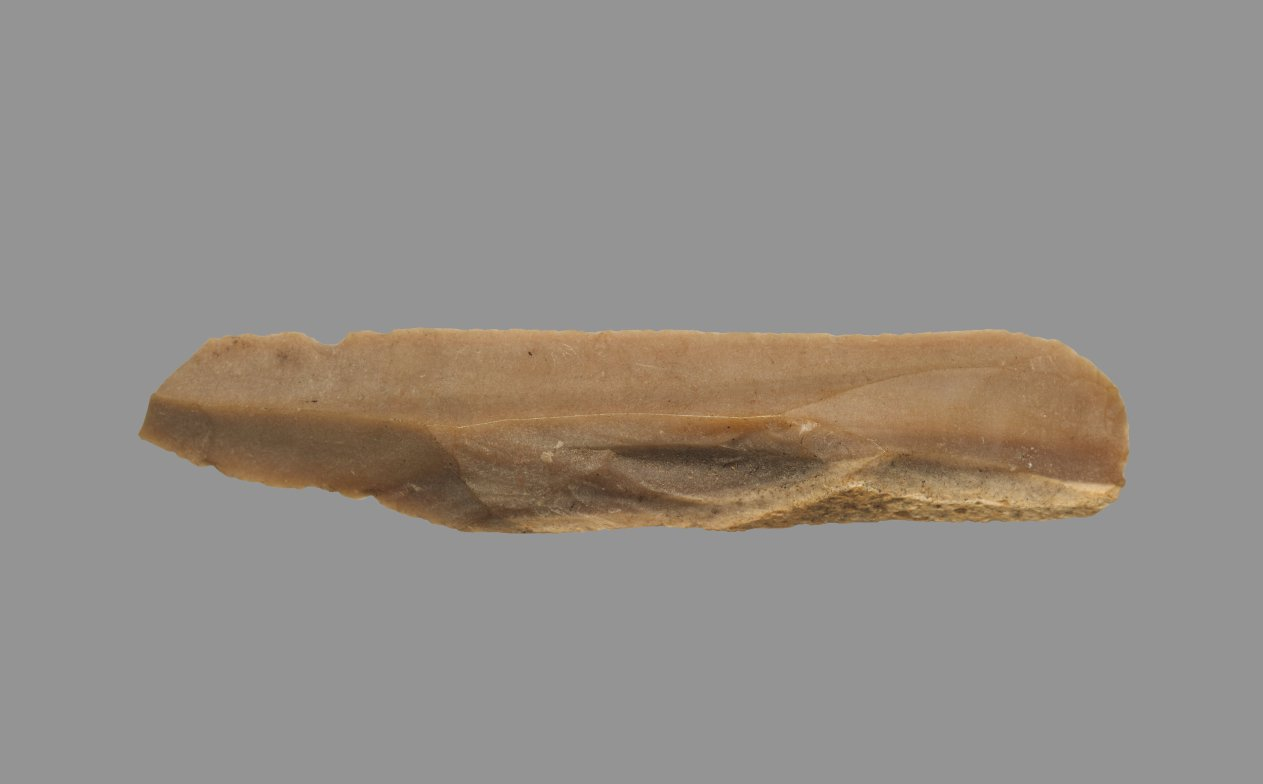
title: Sickle Blade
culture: Egypt, Middle Kingdom (2040–1648 BCE), Dynasty 12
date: 1980–1801 BCE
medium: flint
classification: Implements